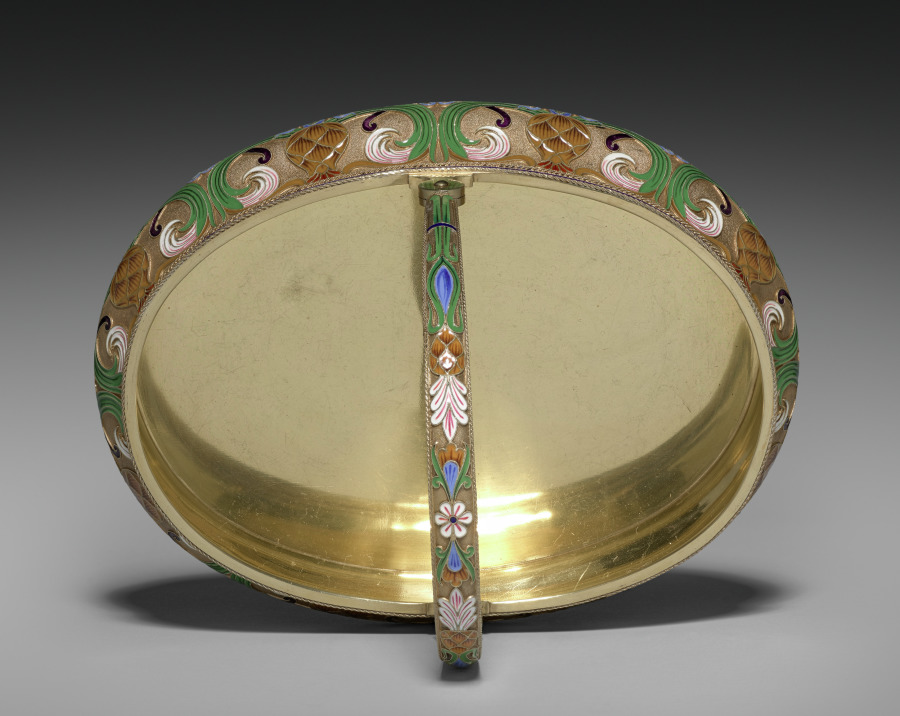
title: Cake Basket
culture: Russia, St. Petersburg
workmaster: attributed to Feodor Ivanovich Rückert (Russian, 1840–1917)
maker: House of Fabergé (Russian, 1842–1918)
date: 1887–96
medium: silver gilt, opaque cloisonné enamel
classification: Miscellaneous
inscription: 88, St. George [assay mark for Moscow, 1882-1896]; C. Fabergé (in Cyrillic); double-headed eagle [imperial warrant]; 10593 scratched.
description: Fabergé’s craftsmen in Moscow, especially under the watchful eye of workmaster Feodor Rückert, became known for their work in the Pan-Slavic or Neo-Russian style, hearkening back to 17th-century motifs of Russian folk art. Often on rather conventional shapes, Rückert and his silversmiths created an explosion of color, achieved through the historic technique of cloisonné enamel in which tiny metal lines are soldered to the surface then filled with glass powders in various colors and fired to create a high gloss finish. The result is a spectacular evocation of the 17th-century originals. Far from mere copies, however, Rückert's designs, such as this tea service, employ naturalistic or abstract motifs in a thoroughly modern adaptation of a remarkable earlier period of Russian art and decoration.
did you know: This cake basket is part of a larger tea service.